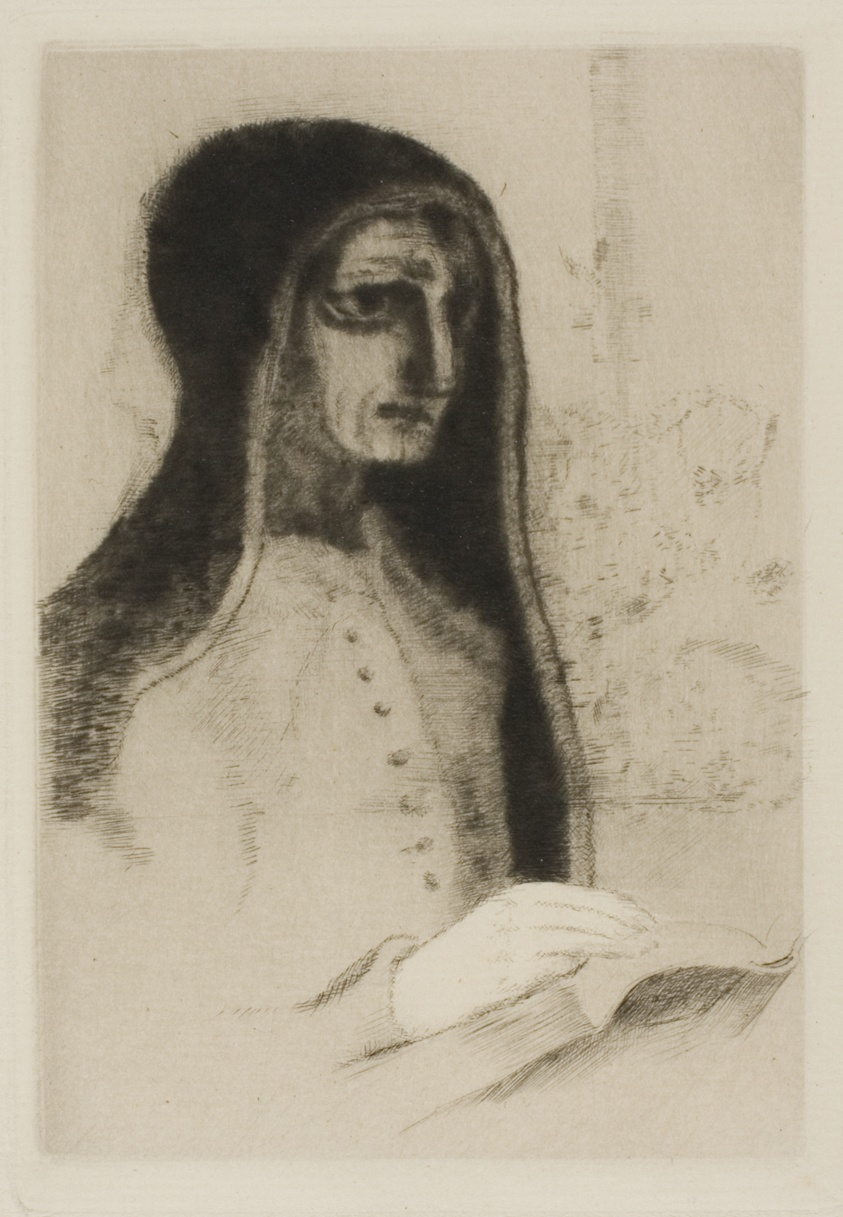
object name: Print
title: The Book (Saint Theresa)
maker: Odilon Redon (French, 1840-1916)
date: 1892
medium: Etching and drypoint on cream laid paper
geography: France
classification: etching; print; prints and drawing; paper